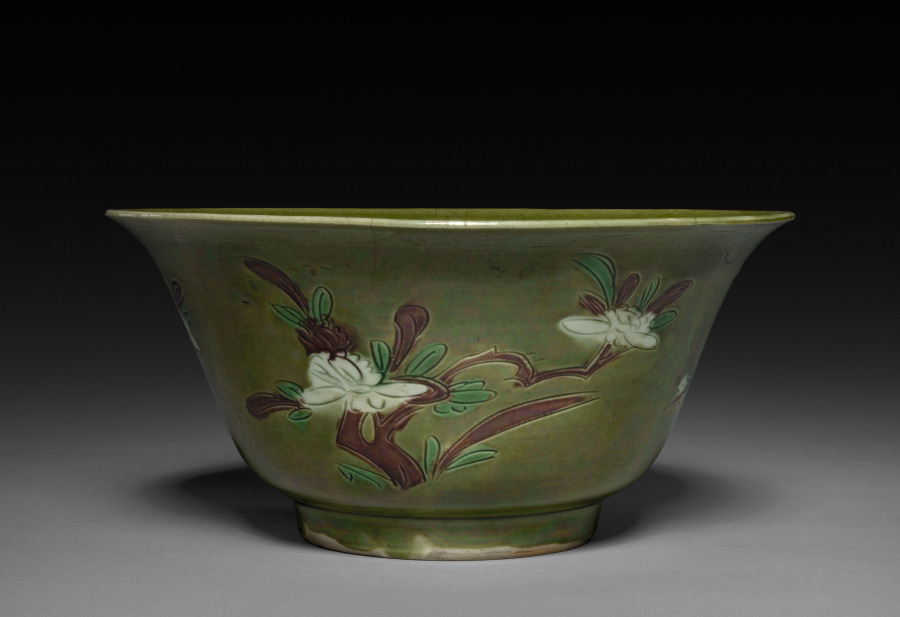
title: Brinjal Bowl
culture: China, Ming dynasty (1368–1644) to Qing dynasty (1644–1911)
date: 1368–1644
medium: white porcelain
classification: Ceramic